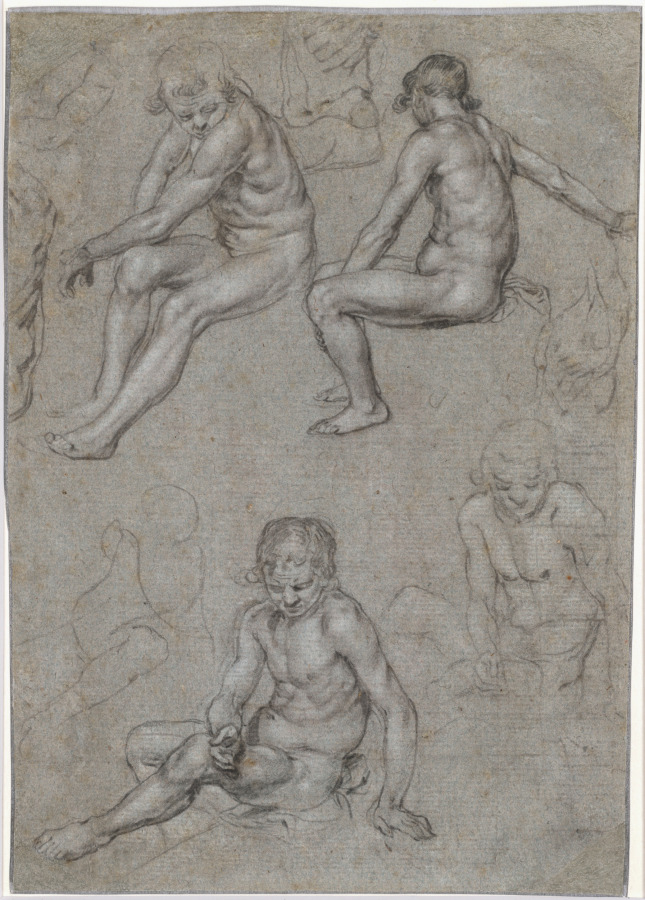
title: Studies of a Naked Seated Boy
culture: Netherlands, 16th - 17th century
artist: Jacob de Gheyn II (Netherlandish, 1565–1629)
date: c. 1603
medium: Black chalk and white chalks with stumping on gray-blue antique laid paper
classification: Drawing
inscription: in graphite, verso: “24” and “376/” and “Helmont”?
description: This sheet of studies of a young male model drawn from various angles is among the earliest nudes drawn from life in the Netherlands. The artist Jacques de Gheyn carefully observed the boy’s body and poses, concentrating on the modeling of his skin and muscles through light and shadow rendered with a combination of black and white chalks on gray-blue paper. The directness of this study was unusual in the Northern Netherlands around 1600, where the vogue for mythological scenes inspired human bodies that were more artificial than natural.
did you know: This sheet of studies of a young male model drawn from various angles is among the earliest nudes drawn from life in the Netherlands.